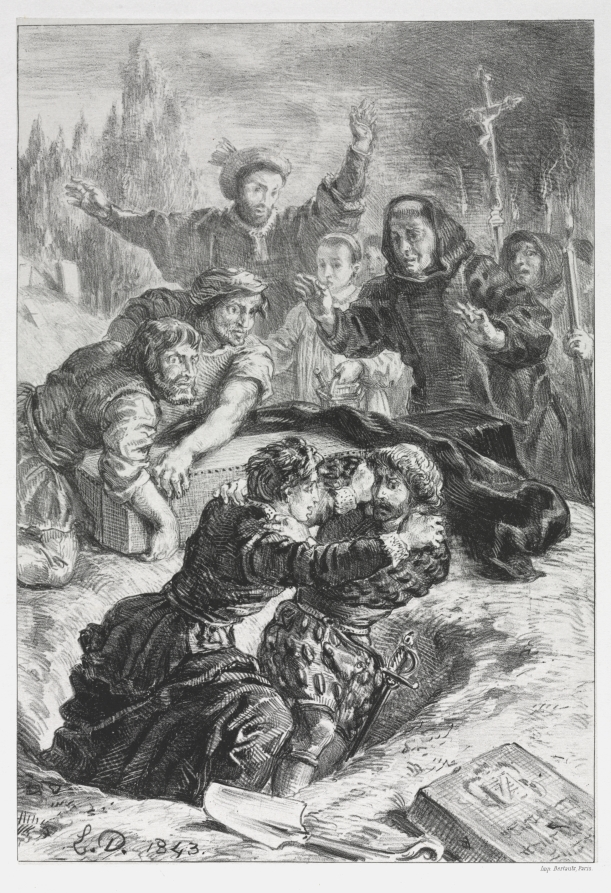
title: Hamlet: Hamlet and Laertes in the Grave of Ophelia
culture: France, 19th century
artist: Eugène Delacroix (French, 1798–1863)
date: 1843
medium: lithograph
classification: Print